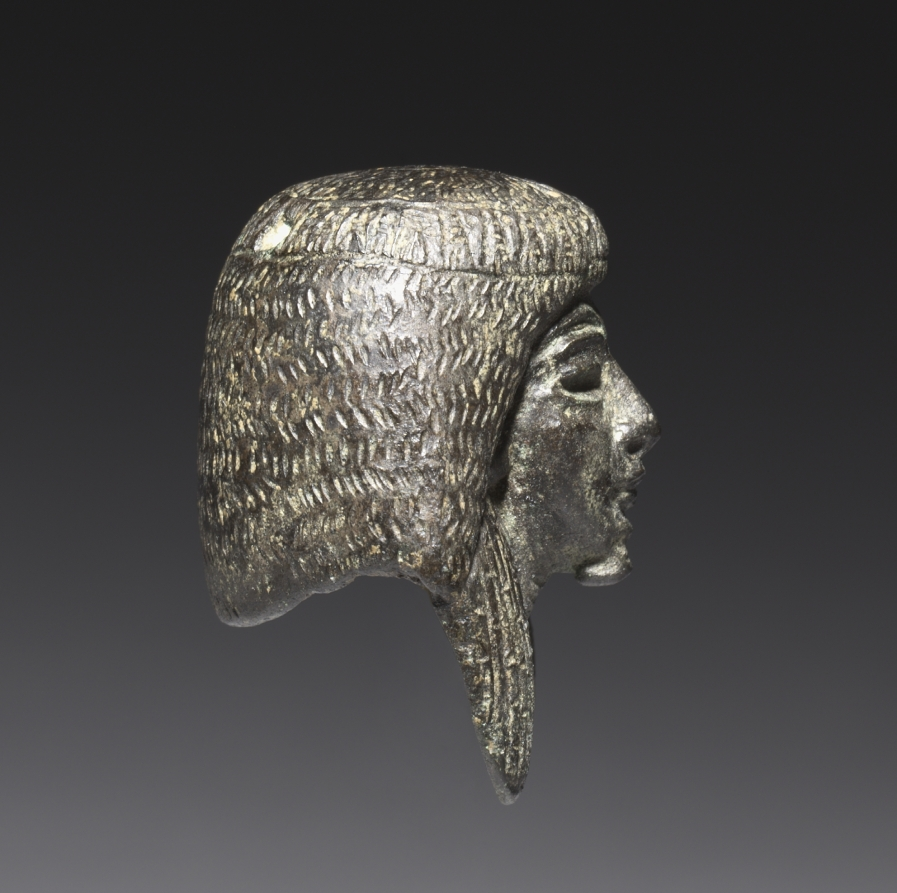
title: Bronze mount from a "Shawabty Bundle": Head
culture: Egypt, Thebes, Wadi Qubbanet el-Qirud, New Kingdom (1540–1069 BCE), Dynasties 18–19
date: c. 1336–1256 BCE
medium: head; bronze face, black copper wig, with traces of gilding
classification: Funerary Equipment